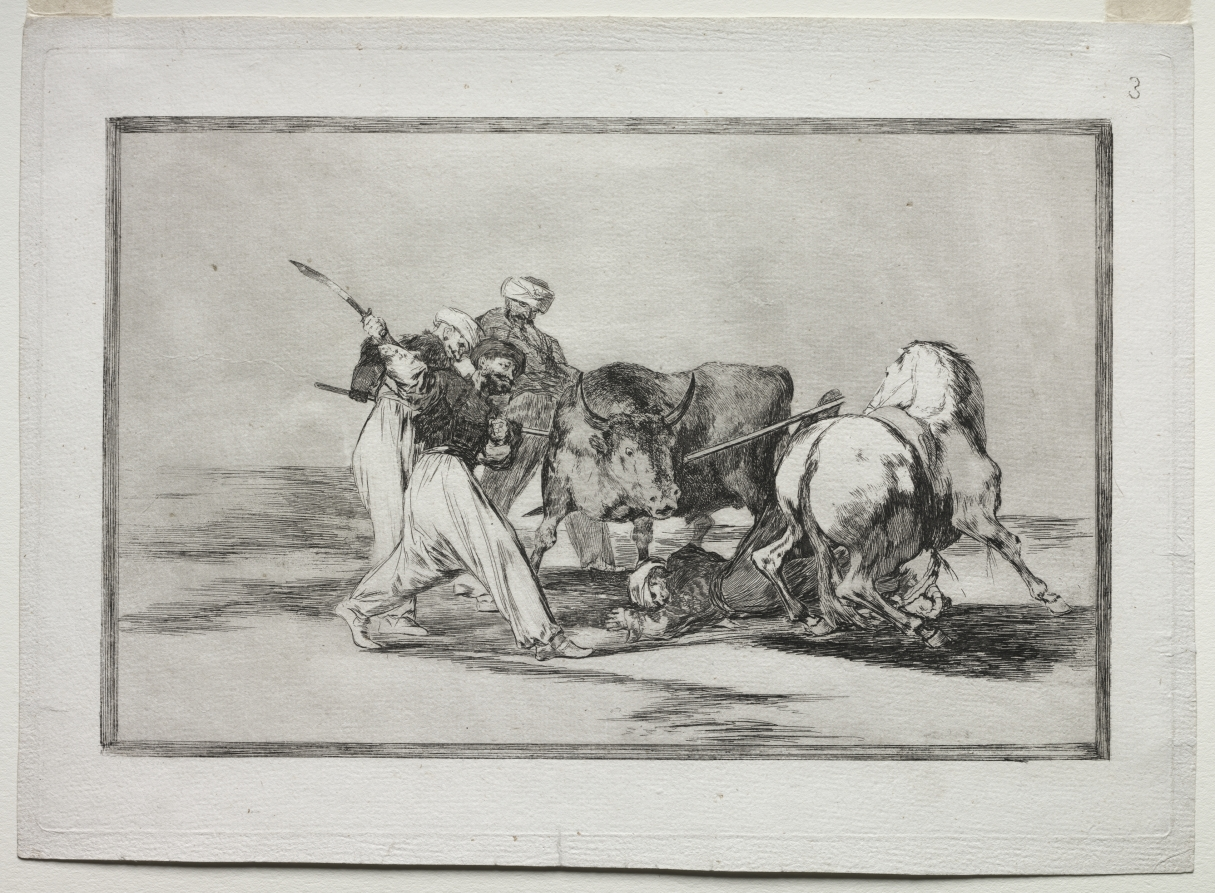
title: The Moors Settled in Spain, Giving Up the Superstitions of the Qur'an, Adopted this Art of Hunting, and Spear a Bull in the Open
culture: Spain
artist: Francisco de Goya (Spanish, 1746–1828)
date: 1815–1816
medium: etching, aquatint, drypoint and engraving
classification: Print